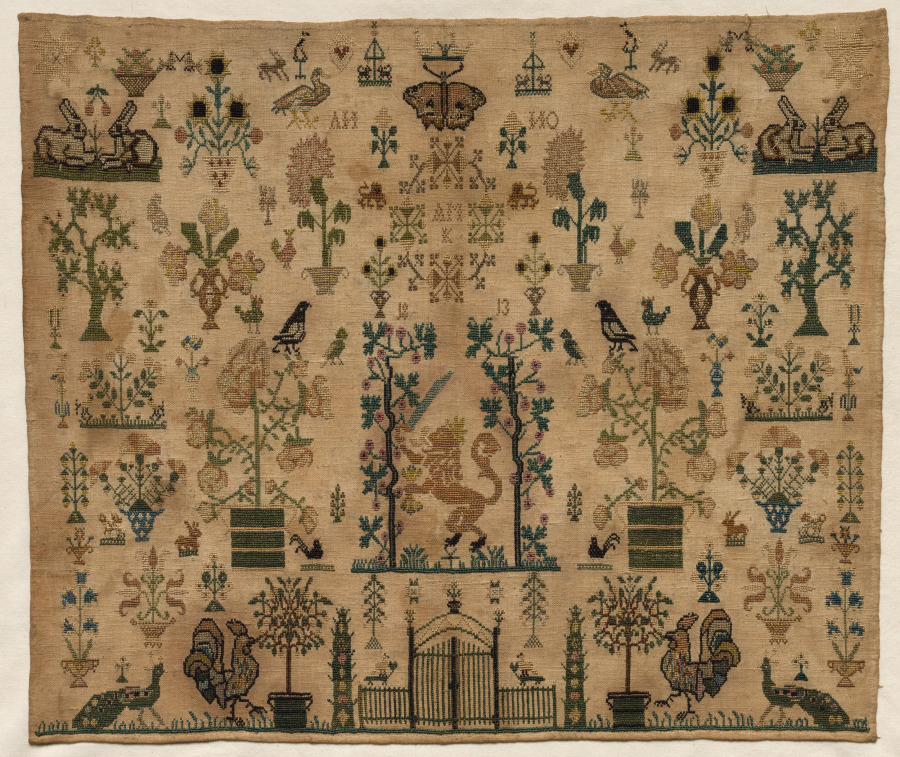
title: Sampler Fragment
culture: Netherlands, early 19th century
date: 1813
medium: embroidery; silk on linen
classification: Sampler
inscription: above design of rampant lion: "AN NO/ AM/K/ 18 13."